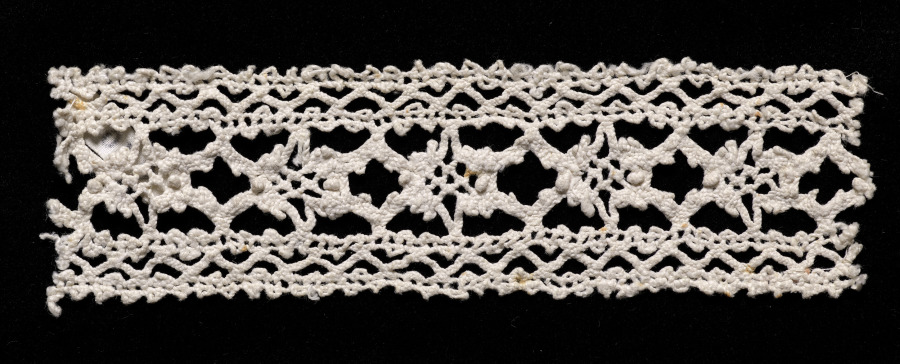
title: Lace Insertion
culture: Italy, Venice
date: 1540–60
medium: Bobbin lace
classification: Lace